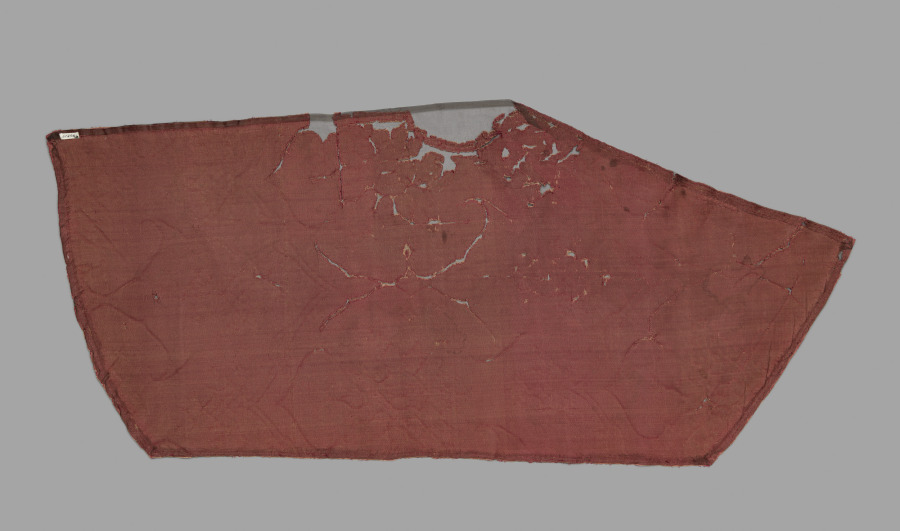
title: Pieces from Disassembled Cape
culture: Italy, 15th century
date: 1400s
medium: velvet (cut and voided); silk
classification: Velvet